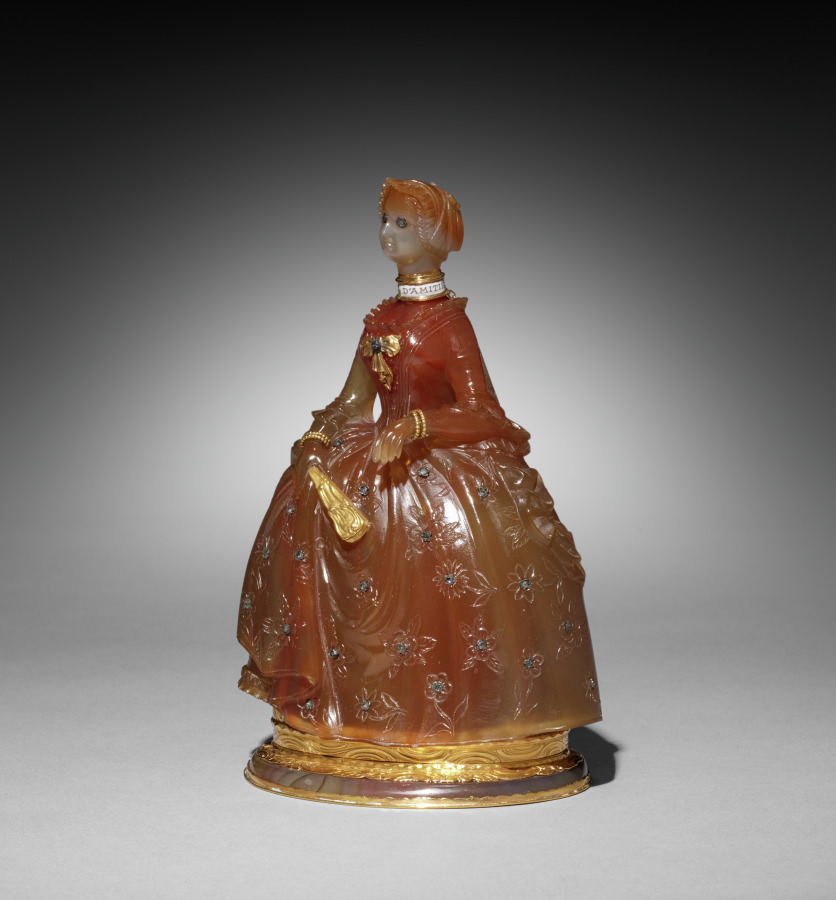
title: Scent Bottle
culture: England, 18th century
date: c. 1770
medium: chalcedony mounted in gold decorated with diamonds and enamel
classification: Miscellaneous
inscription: on neck collar: Gage d'amitie.